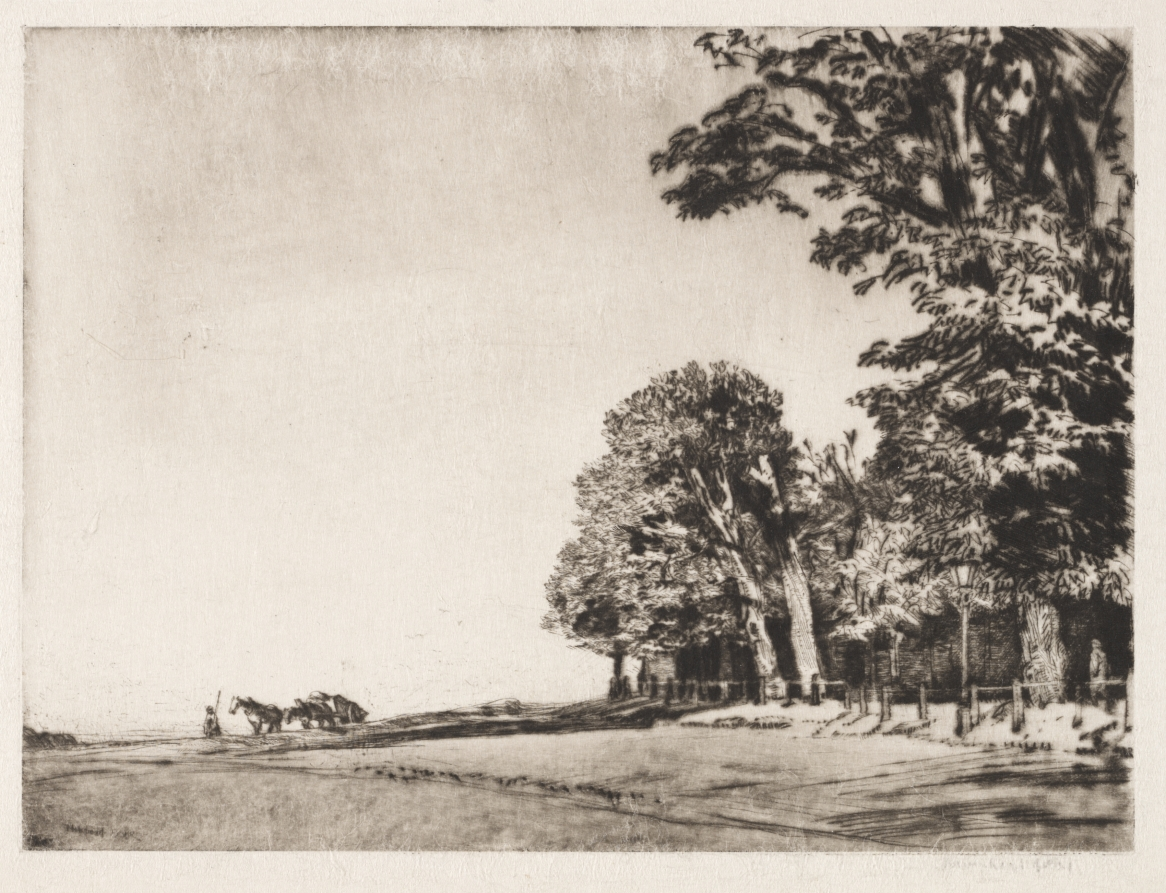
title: Hampstead Heath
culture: England, 20th century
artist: Muirhead Bone (British, 1876–1953)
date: 1906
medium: drypoint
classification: Print